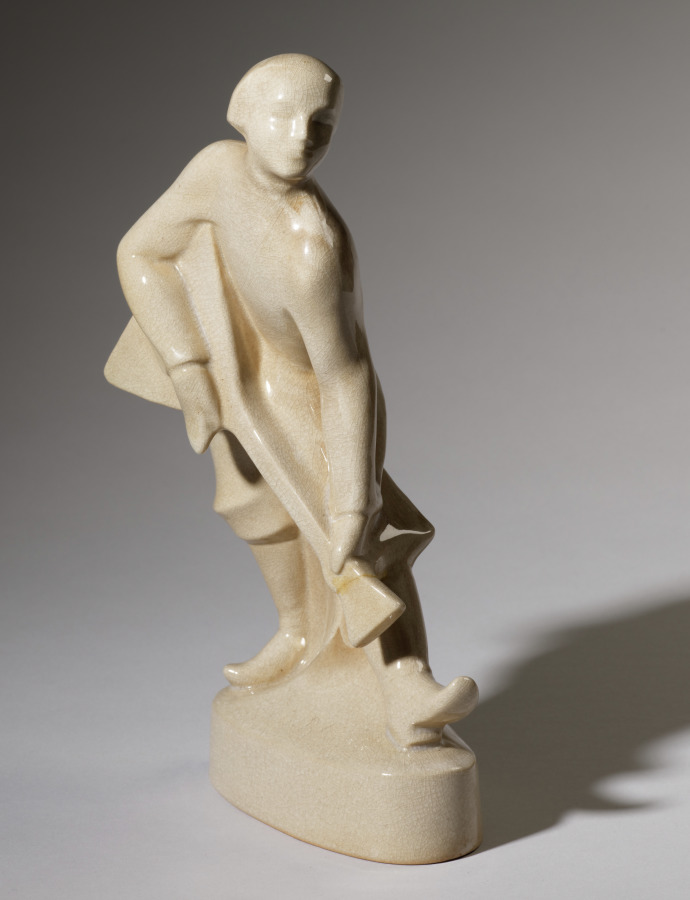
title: Balalaika Player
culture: America, Ohio, Cleveland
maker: Cowan Pottery Studio (America, Rocky River, Ohio, 1920–1931)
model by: Alexander Blazys (American, born Russian Empire [now Lithuania], 1894–1963)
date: 1927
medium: mold-made ceramic, glazed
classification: Ceramic